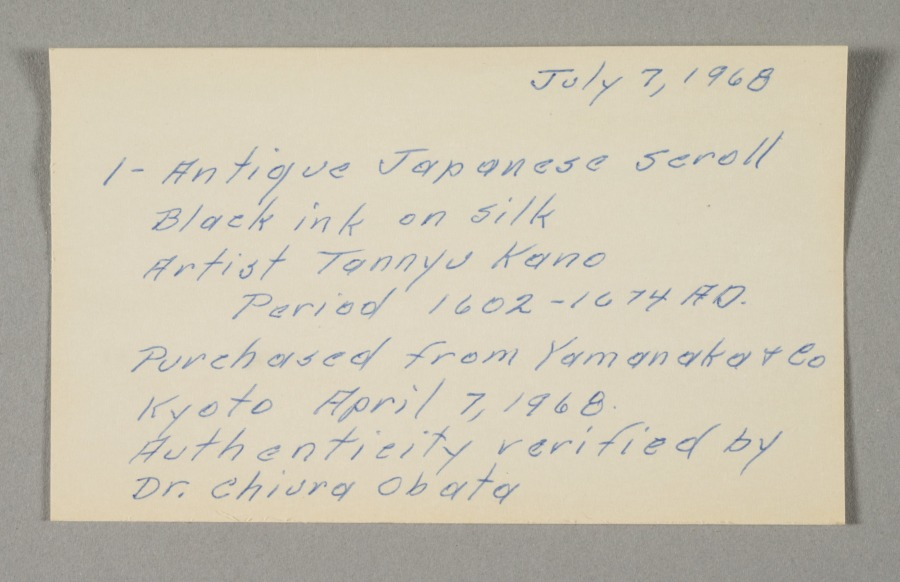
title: Chinese Sages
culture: Japan, Edo period (1615–1868)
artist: attributed to Kano Tan’yū (Japanese, 1602–1674)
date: mid- to late 1600s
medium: hanging scroll; ink and color on silk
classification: Painting